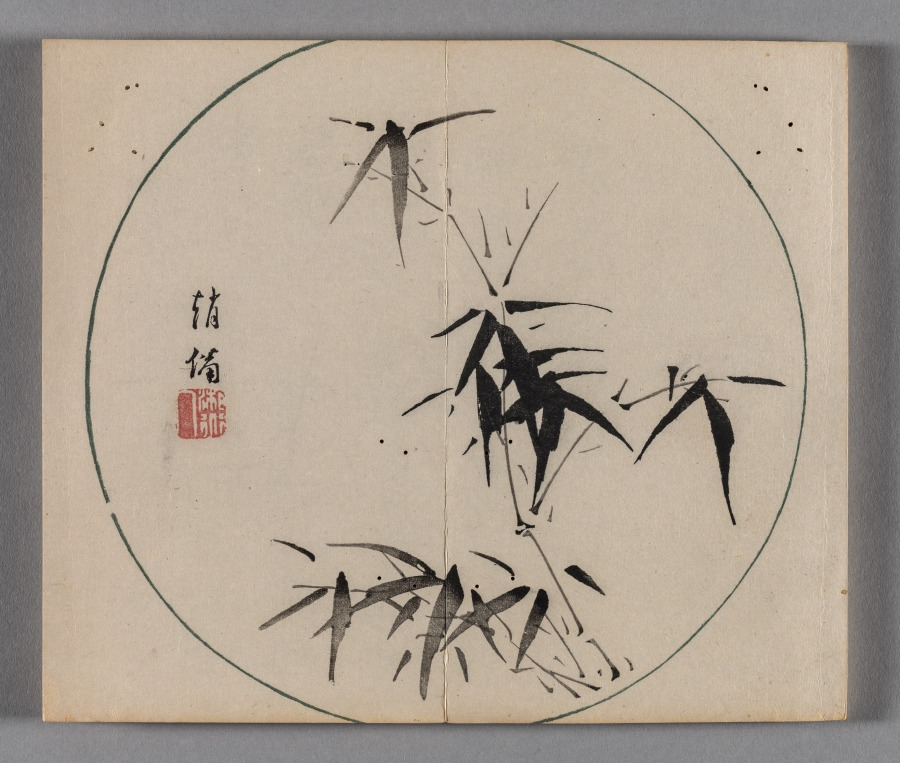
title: Ten Bamboo Studio Painting and Calligraphy Handbook (Shizhuzhai shuhua pu): Round Fans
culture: China, Qing dynasty (1644-1911)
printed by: Hu Zhengyan (Chinese, c. 1584–1674)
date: 1633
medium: Woodblock-printed book; ink and colors on paper; first edition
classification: Print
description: Color printing reached a level of perfection in the early 1600s, as seen in this Ten Bamboo Studio Collection of Calligraphy and Painting and the Mustard Seed Garden Manual of Painting (printed 1679 and 1701). The painterly quality, precision in registering (aligning) the woodblocks, and harmonious colors made them the most successful color print editions in Chinese history. Both editions were printed and compiled in Nanjing, spread nationwide, and had a great impact on the arts in Japan and Korea.